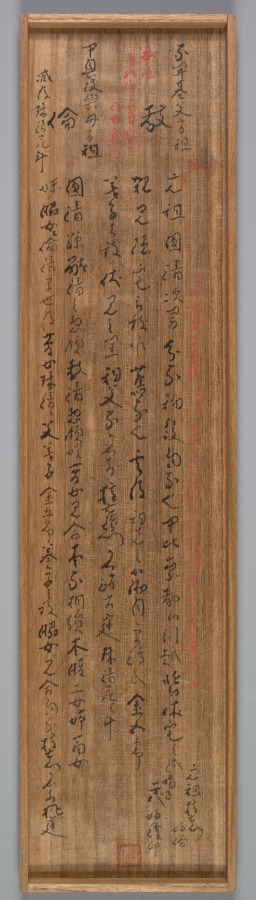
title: Pair of Portraits of Samurai-Officials: Hirai Kyosei and Hirai Rinsei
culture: Japan, Edo period (1615–1868)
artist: Sando Hyosho (Japanese)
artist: Tsukioka Settei (Japanese, 1710–1786)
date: 1776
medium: hanging scrolls; ink and color on silk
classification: Painting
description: In this pair of figure paintings, the artist provided generational portraits of two clan leaders from the Hirai family, accompanied by lengthy inscriptions in a distinctive calligraphic style from separate scholar-officials.